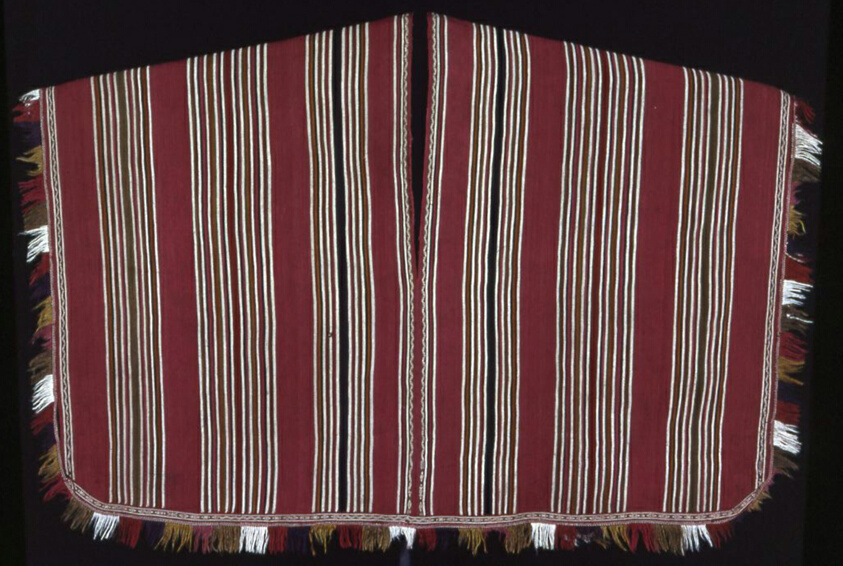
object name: Textile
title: Poncho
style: aymará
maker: Aymara (Bolivia, La Paz, Pacajes)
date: 1850/1900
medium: Wool, stripes of plain weave and three-color complementary warp weave; joined with darning stitches; bottom edged with tape of three-color complementary warp weave; plain weave with extended supplementary patterning weft fringe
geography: Bolivia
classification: textile; weaving; costume